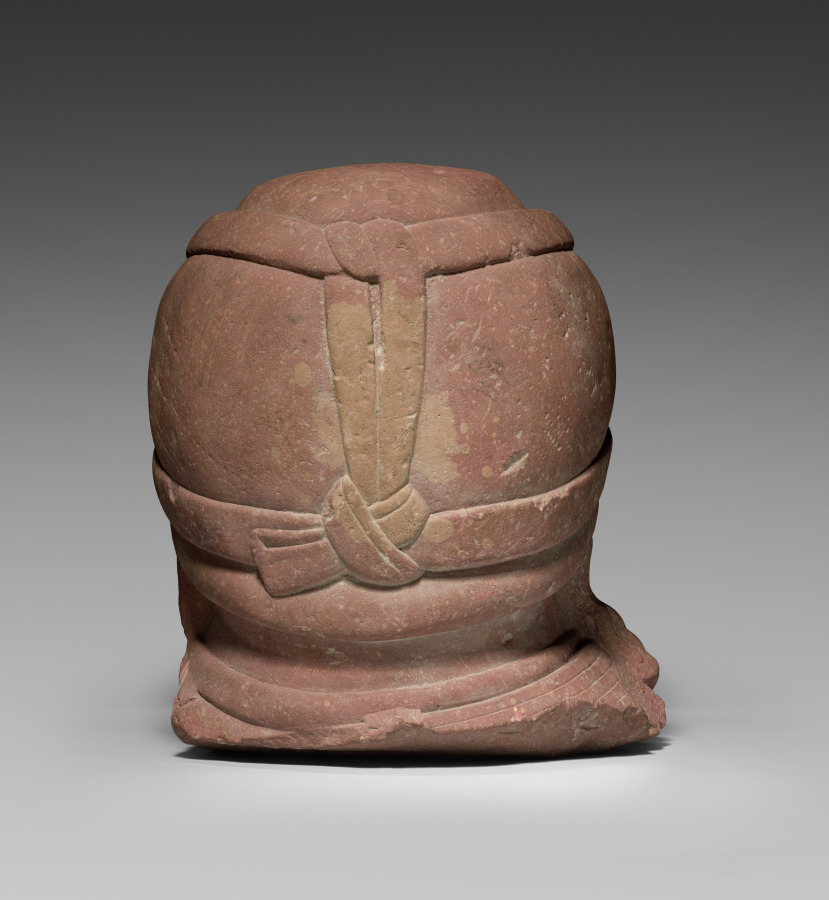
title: Head of a Yaksha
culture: Northern India, Uttar Pradesh, Mathura, Shunga period (185–78 BCE)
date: c. 125 BCE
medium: mottled red sandstone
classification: Sculpture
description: Colossal statues of yakshas, male divinities who personify the productive forces of nature, were especially popular in the northern Indian region around the ancient city of Mathura. They were installed in shrines in parks and gardens, often associated with extraordinary trees. The red sandstone is from a nearby quarry, called Sikri.